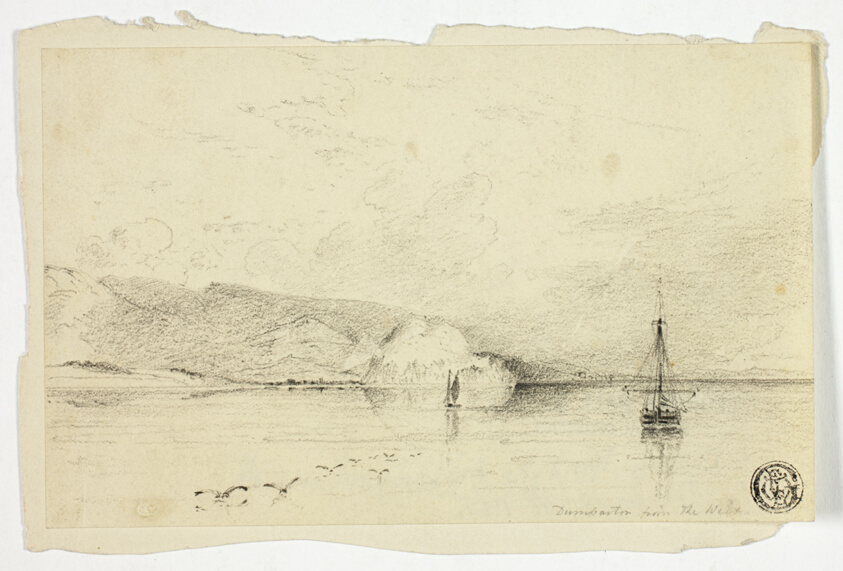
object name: Drawing and Watercolor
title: Dunbarton from the West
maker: Anthony Vandyke Copley Fielding (English, 1787-1855)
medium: Black crayon, with traces of graphite, on cream wove paper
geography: England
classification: chalk; drawings (visual works); prints and drawing